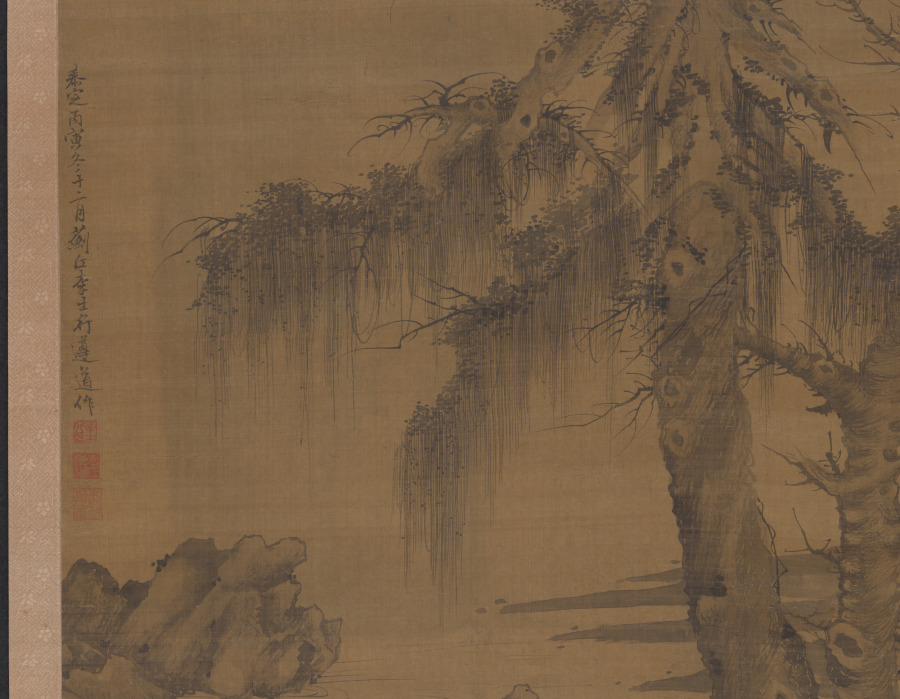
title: Old Trees by a Cool Spring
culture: China, Yuan dynasty (1271-1368)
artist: Li Shixing (Chinese, 1283–1328)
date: 1326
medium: hanging scroll; ink on silk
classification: Painting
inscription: 泰定丙寅年冬十二月薊丘李士行遵道作。[印] 李士行印; 李氏遵道; 遊戲翰墨.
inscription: 薊丘李侯能畫松，蟠根錯節騰蛟龍。 枯梢削鐵歲月古，細葉當風紫翠重。 昔人曾入子固夢，此株豈為秦官封。 畢宏韋偃偕已矣，請公放筆吾將從。 華溪九十翁沈夢麟書 蘊中上人題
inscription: [印] 明善堂所見書畫印記; [印] 怡親王寶